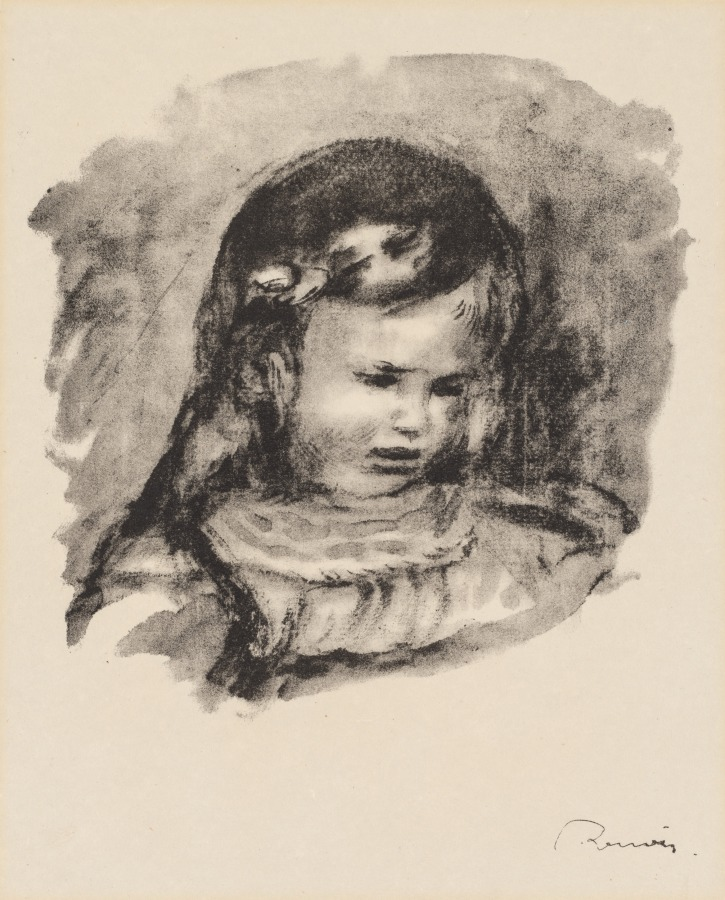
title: Claude Renoir, the Head Lowered (Claude Renoir, la tête baissée)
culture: France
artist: Pierre-Auguste Renoir (French, 1841–1919)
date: c. 1904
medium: lithograph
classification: Print